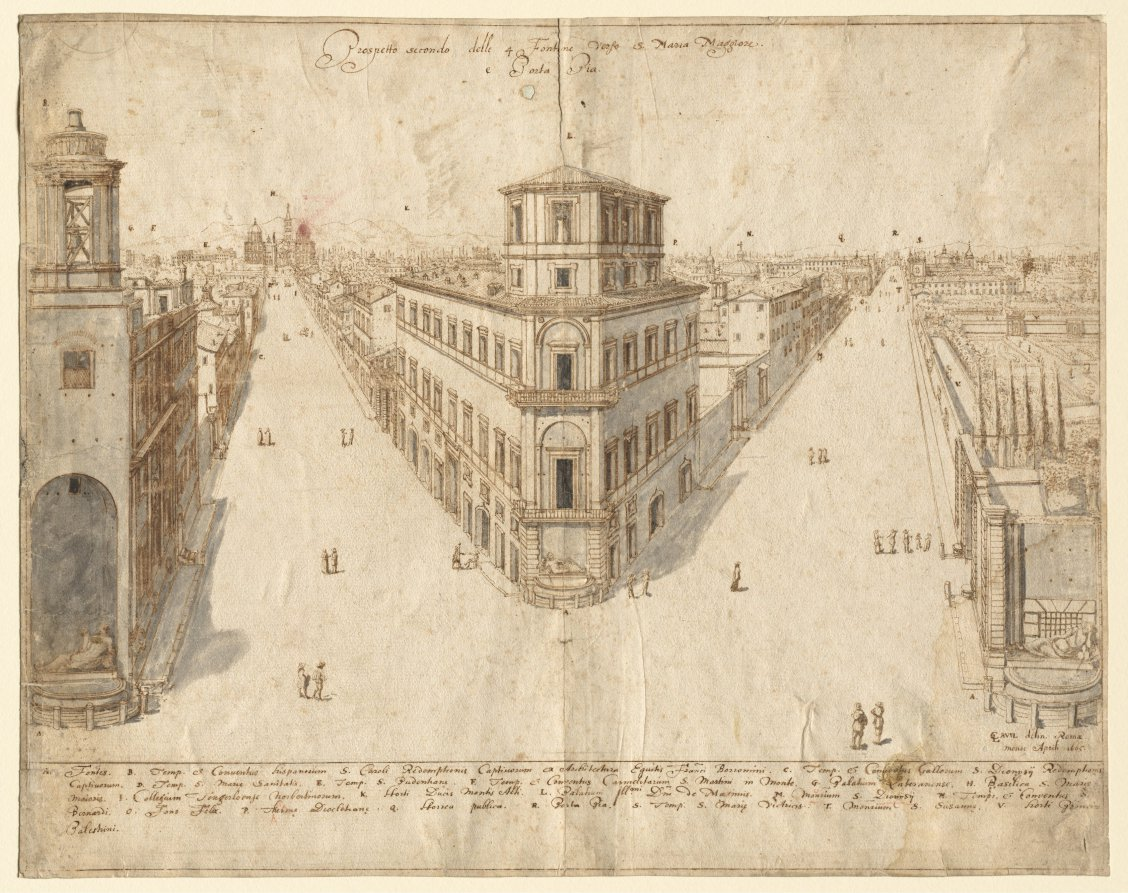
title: Eighteen Views of Rome: The Quattro Fontane Looking Toward Santa Maria Maggiore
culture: Flanders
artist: Lievin Cruyl (Flemish, c. 1640-c. 1720)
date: 1665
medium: pen and brown ink and brush and gray wash over graphite; framing lines in brown ink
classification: Drawing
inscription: signed, lower right, in brown ink: [artist's monogram: LC] RVYL delin: Romæ / mense Aprili 1665. ; by artist, upper center, in brown ink: Prospetto secondo delle 4. Font[a]ne Verso S. Maria Maggiore. / e Porta Pia. ; by artist, throughout composition, in brown ink: [the letters A-V] ; by artist, across bottom, in brown ink: A. Fontes. B. Temp. et Conventus hispaniorúm S. Caroli Redemptionis Captivorum ex Architectura Equitis Frañci Borromini. C. Temp. et Conventus Gallorum S. Dionysij Redemptionis / Captivorum. D. Temp. S. Mariæ Sanitatis. E. Temp. S. Pudentianæ. F. Temp. et Conventus Carmelitarúm S. Martini in Monte. G. Palatium Lateranense. H. Basilica S. Mariæ / Maioris. I. Collegium Tongerloense Norbertinorum. K. Horti Ducis Montis Alti. L. Palatium Illmi.[mi superscript, period beneath m] Dñi de Maximis. M. Moñrium[abbreviation mark in red chalk] S. Dionysij[underlined in red chalk]. N. Temp. et Conventus S. / Bernardi. O. Fons Felix. P. Thermæ Diocletianæ. Q. Horrea publica. R. Porta Pia. S. Temp. S. Mariæ Victricis. T. Moñrium S. Súsannæ. V. Horti Princi [= ?] / Palestrini. ; VERSO, upper left, in brown ink: [illegible] [partially masked] ; ON STRIPS OF PAPER MOUNTED TO VERSO, lower right, in graphite: A20984 ; lower right, in graphite: E. 21